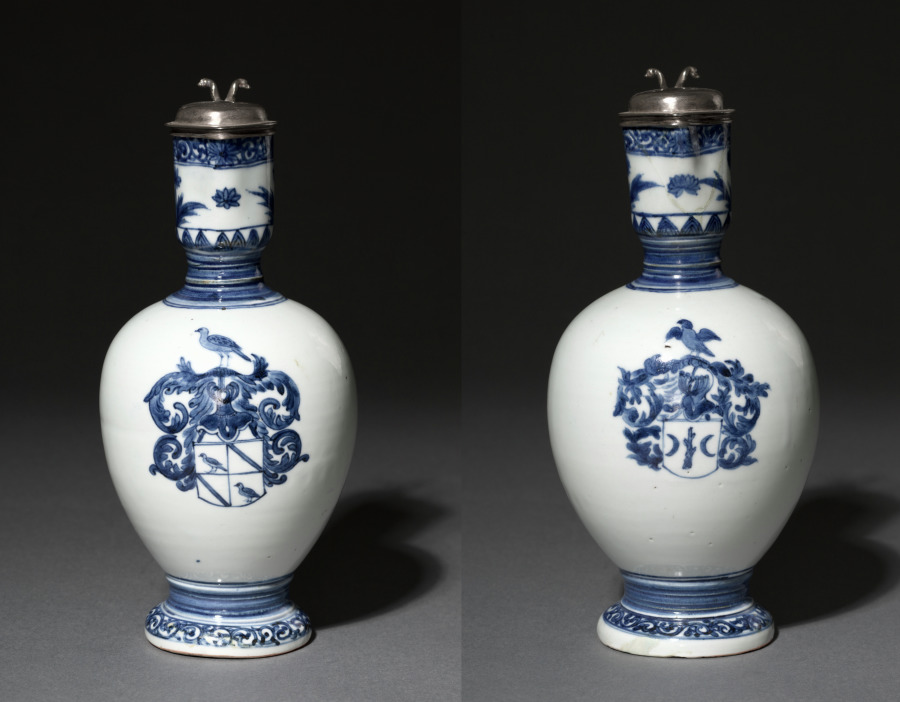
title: Pair of Jugs with Silver Mounts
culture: Japan, Edo period (1615–1868)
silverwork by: Barent van Leeuwen (Dutch, 1637–1682)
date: c. 1662–76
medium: Porcelain with underglaze blue decoration; silver mounts (Hizen ware, Arita type)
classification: Ceramic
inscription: [on silver]: town mark for Amsterdam; lion rampant crowned (alloy mark for 0-934 silver); d (date letter for 1666), maker's mark of Barent van Leeuwen.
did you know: The coat of arms on this jug are those of the Valckenier family, active in the Dutch East India Company.